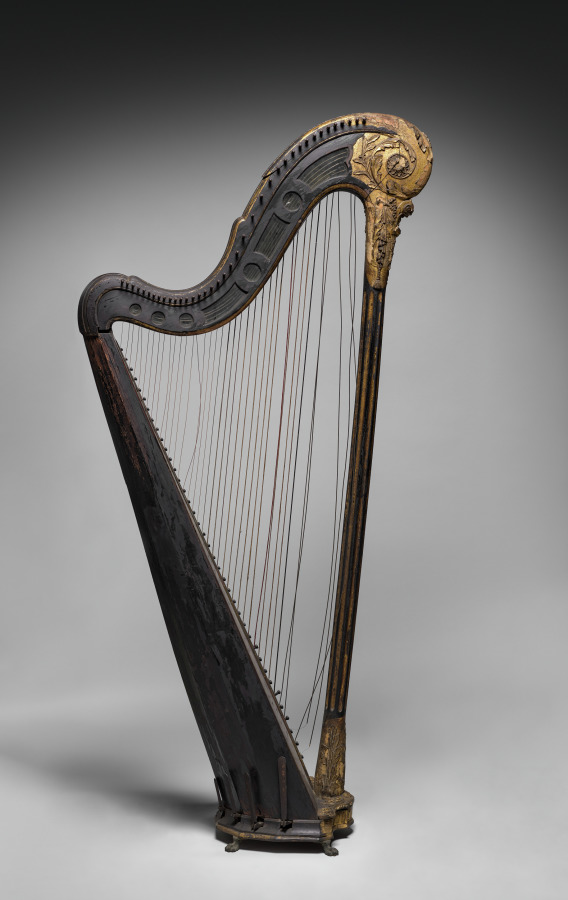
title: Harp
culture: France, 18th century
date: 1700s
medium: wood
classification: Musical Instrument